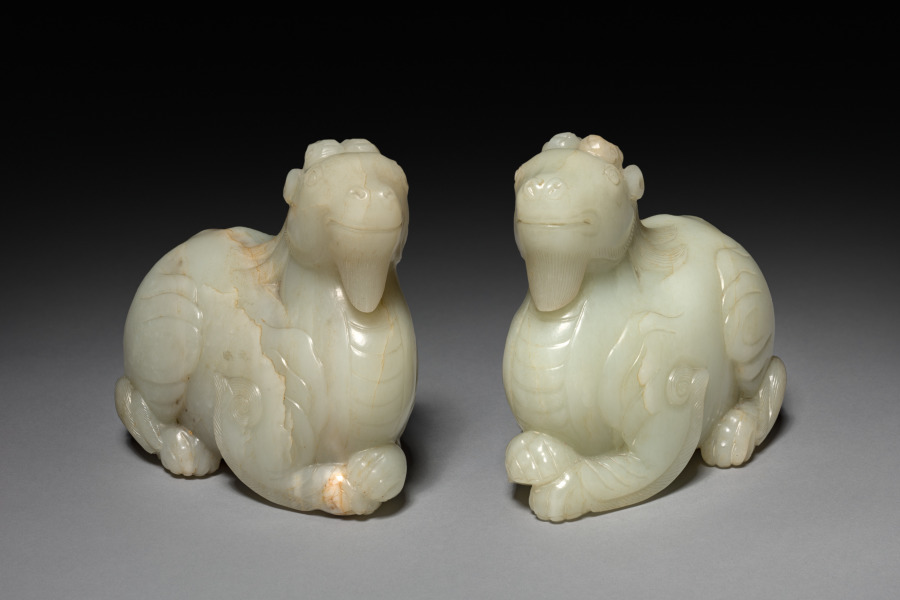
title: Pair of Fantastic Animals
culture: China, Qing dynasty (1644-1911)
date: 1700s–1800s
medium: jade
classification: Jade